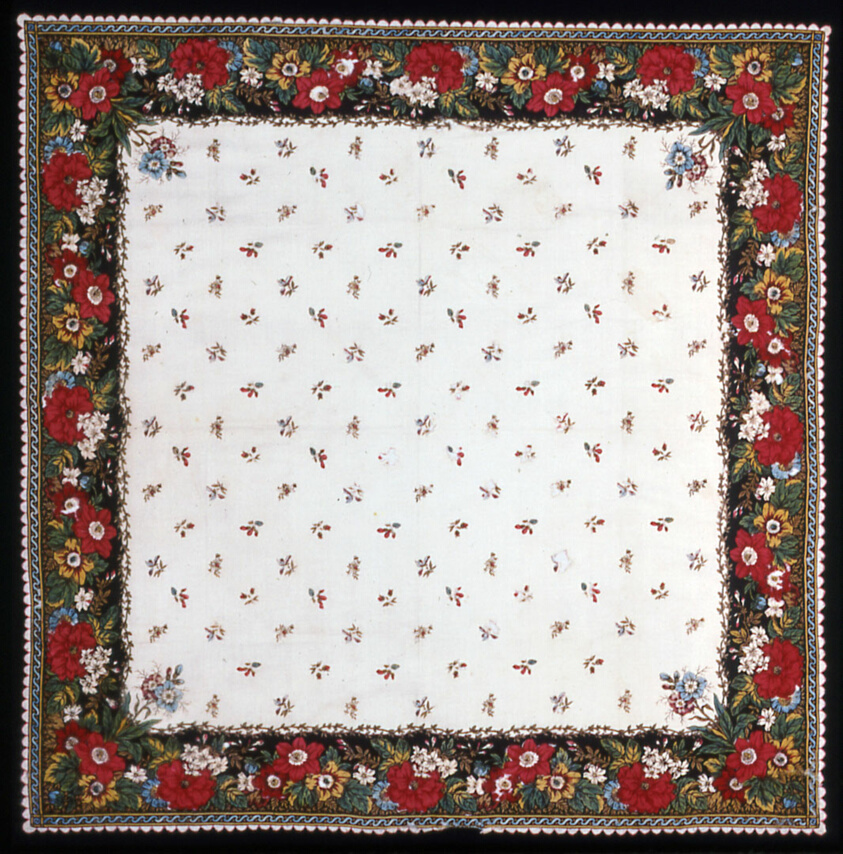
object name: Textile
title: Handkerchief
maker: France, Mulhouse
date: c. 1800/15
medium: Cotton, plain weave; roller or block printed; edge oversewn in buttonhole stitch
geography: Mulhouse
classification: textile; weaving - printed; accessories (object genre)